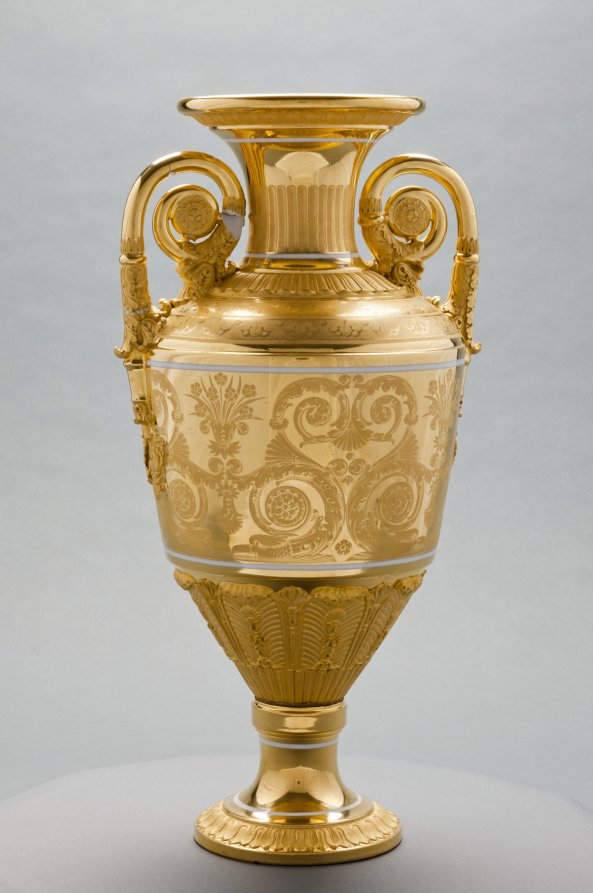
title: Vase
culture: Russia, St. Petersburg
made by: St. Petersburg Imperial Porcelain Factory (Russian)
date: c. 1820–1830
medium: gilt porcelain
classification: Ceramic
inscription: inscribed: "Moreau" in gold near lip.